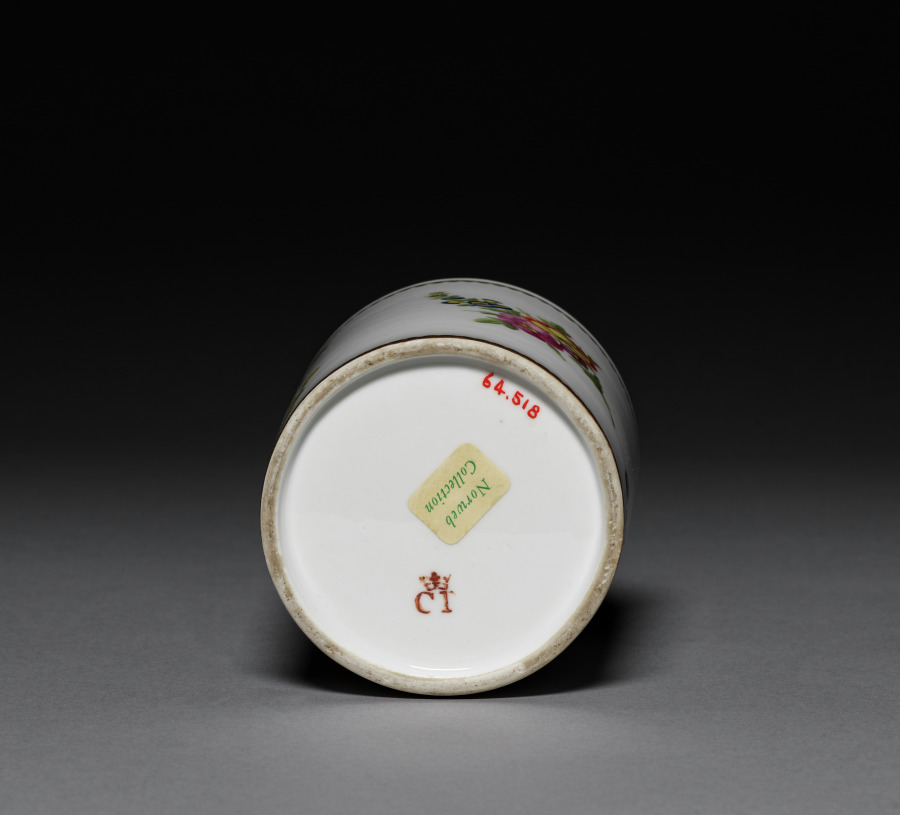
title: Jar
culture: France, 18th century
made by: Faubourg Saint-Denis (French)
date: c. 1775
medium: porcelain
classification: Ceramic